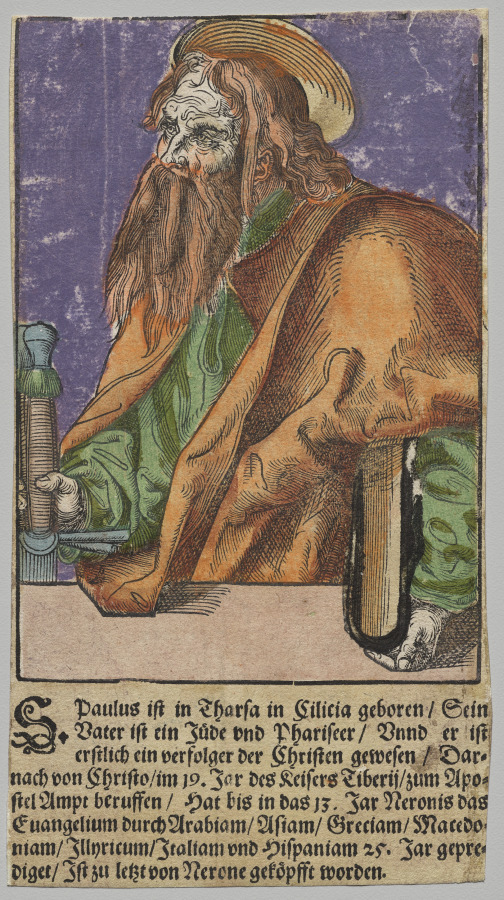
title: Paul from Christ, the Apostles, and Saint Paul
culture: Germany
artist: Lucas Cranach the Elder, After (German, 1472–1553)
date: 1563/64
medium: Woodcut with letterpress text, hand colored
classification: Print